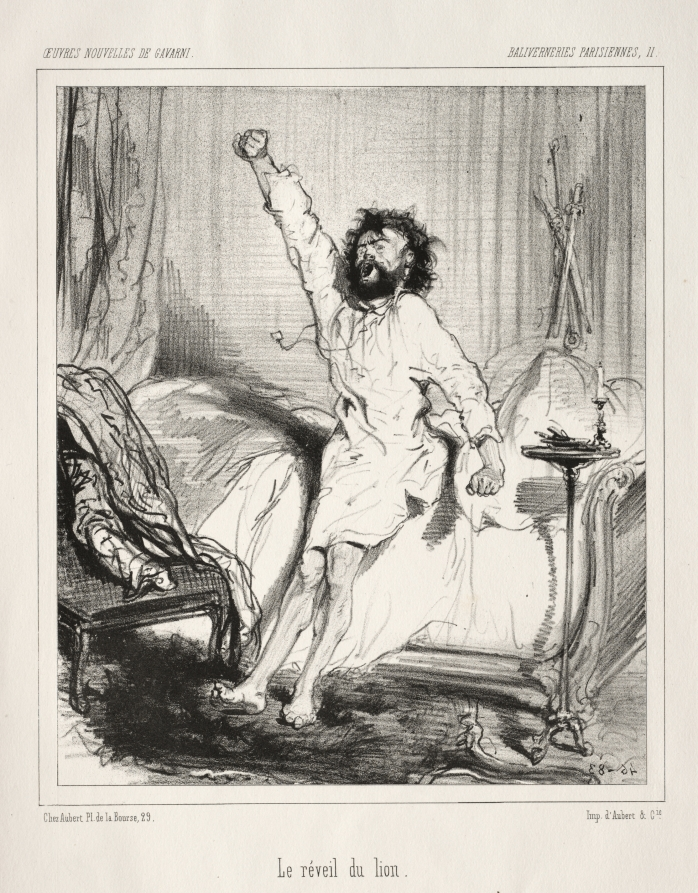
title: Baliverneries Parisiennes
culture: France, 19th century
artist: Paul Gavarni (French, 1804–1866)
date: c. 1847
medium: lithograph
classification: Print